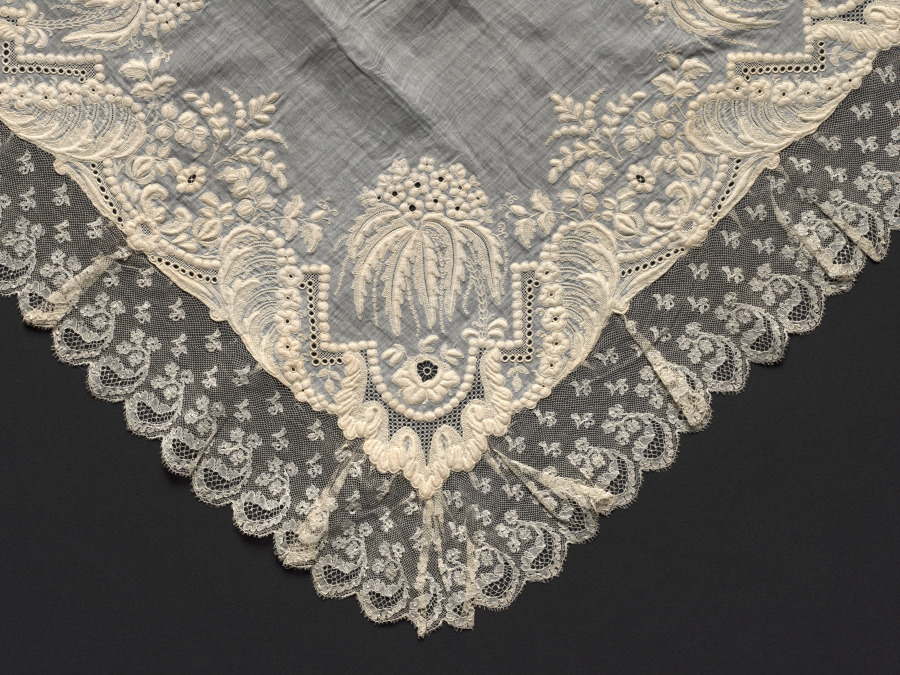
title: Lace Handkerchief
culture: Flanders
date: 1800–1820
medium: Plain weave linen center with cut and drawn work and embroidery; bobbin lace edging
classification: Embroidery